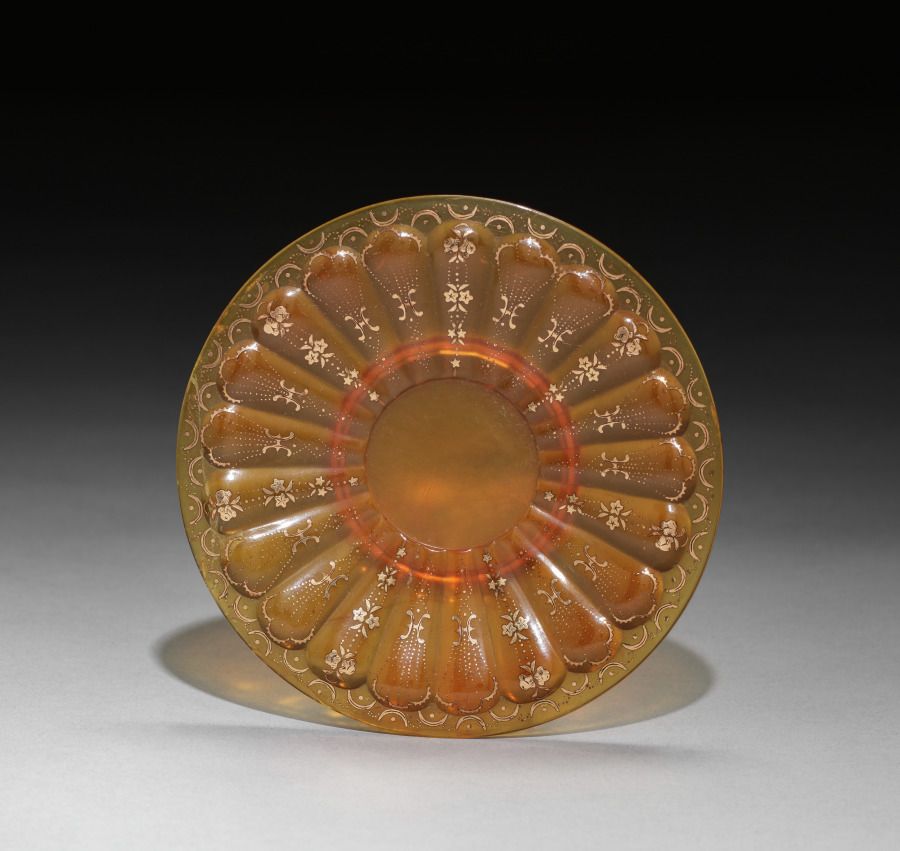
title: Saucer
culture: France, 18th century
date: c. 1730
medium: amber decorated with inlaid gold and mother-of-pearl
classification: Miscellaneous